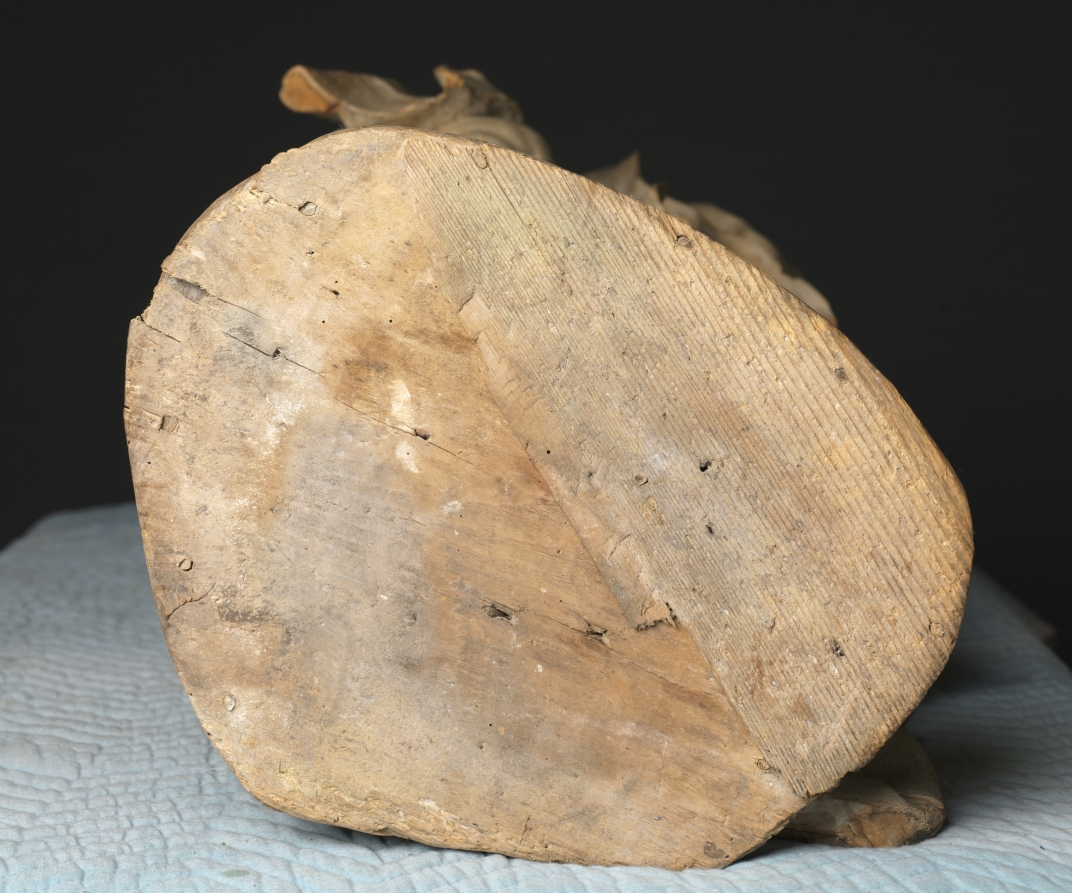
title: A Saint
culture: Germany or Austria, 18th century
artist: follower of Diego Francesco Carlone (Italian, 1674–1750)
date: c. 1730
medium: wood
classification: Sculpture